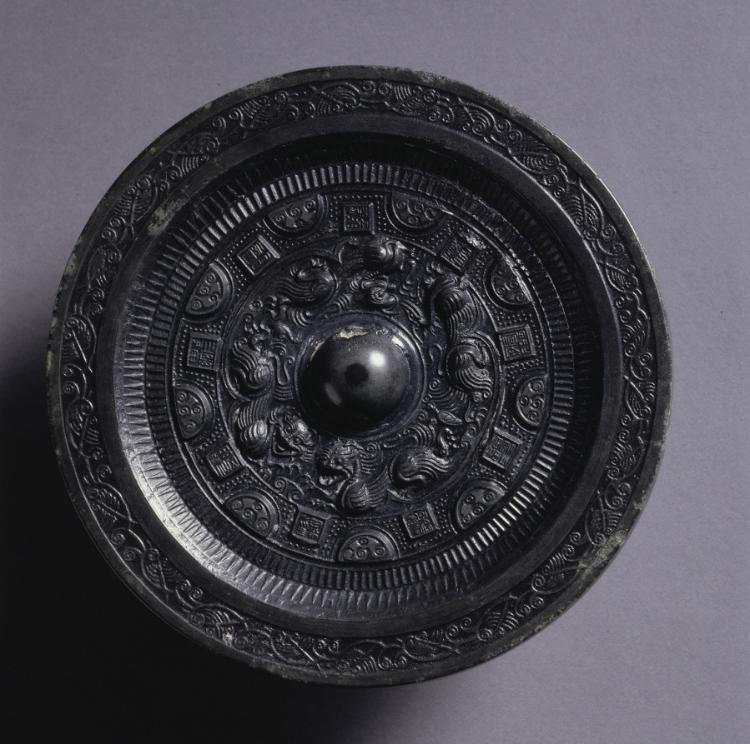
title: Mirror with Auspicious Animals Surrounded by Rings of Squares and Semicircles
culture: China, Eastern Han dynasty (25–220 CE)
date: late 100s CE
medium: bronze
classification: Metalwork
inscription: 吾作明鏡，幽凍三商。伯牙作樂， 眾神風容。宜大富兮，有福安服。 曾年益壽，子孫番昌，其師命長。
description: Inscription: I made this bright mirror By refining the three metals. BoYa is making music; The multitude of gods display their forms. [The mirror] is suitable for a man with great wealth and good fortune. He [who has it] will add years to life. His descendants will also prosper. Even this master will enjoy longevity.